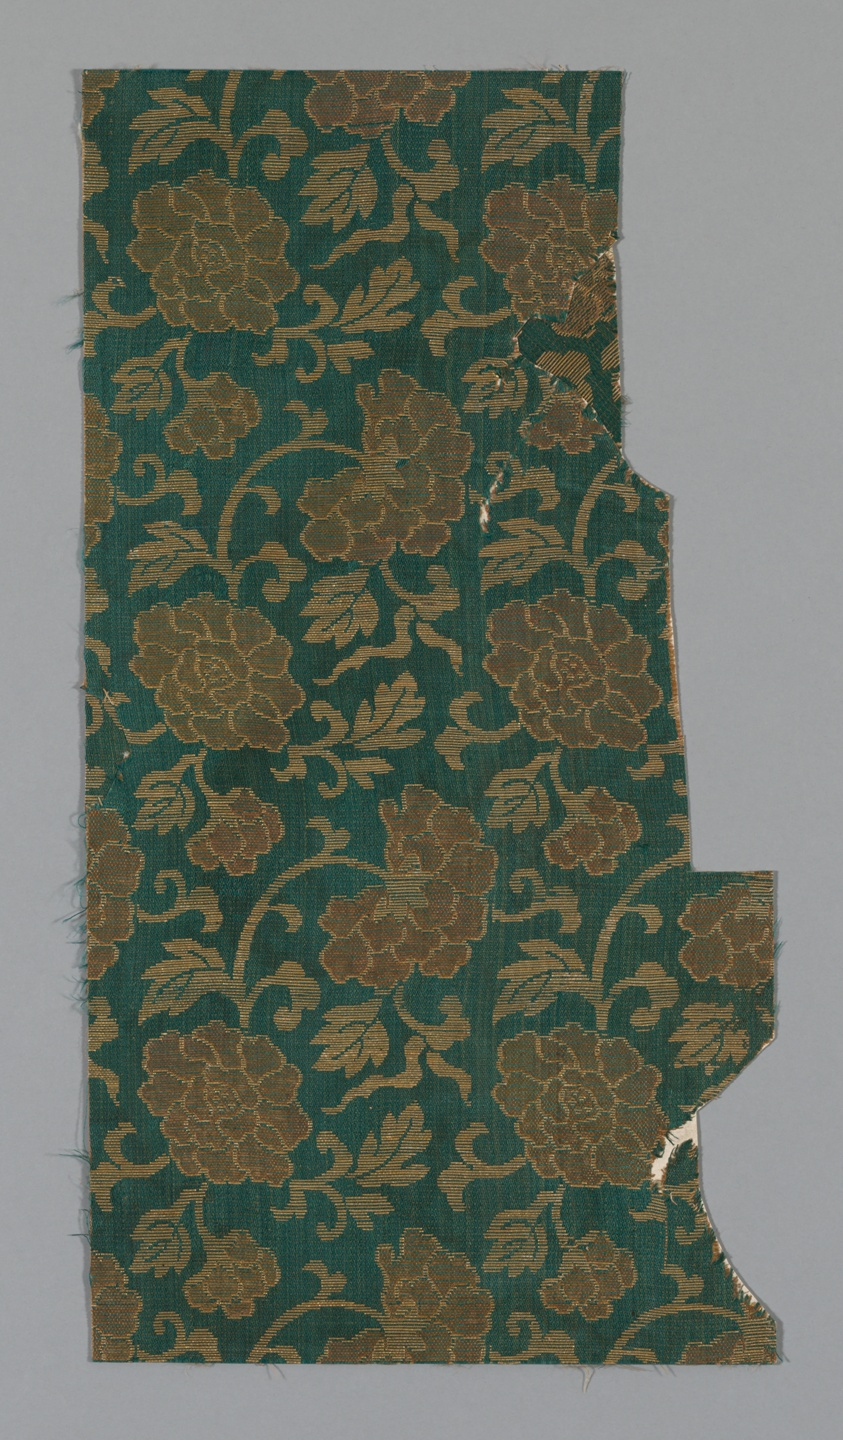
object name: Textile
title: Fragment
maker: Japan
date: 18th century, late Edo period (1789–1868)/ Meiji period (1868–1912)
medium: Plain compound twill, silk and gilt paper; 2 1/2 strips to m.m.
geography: Japan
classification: weaving; textile